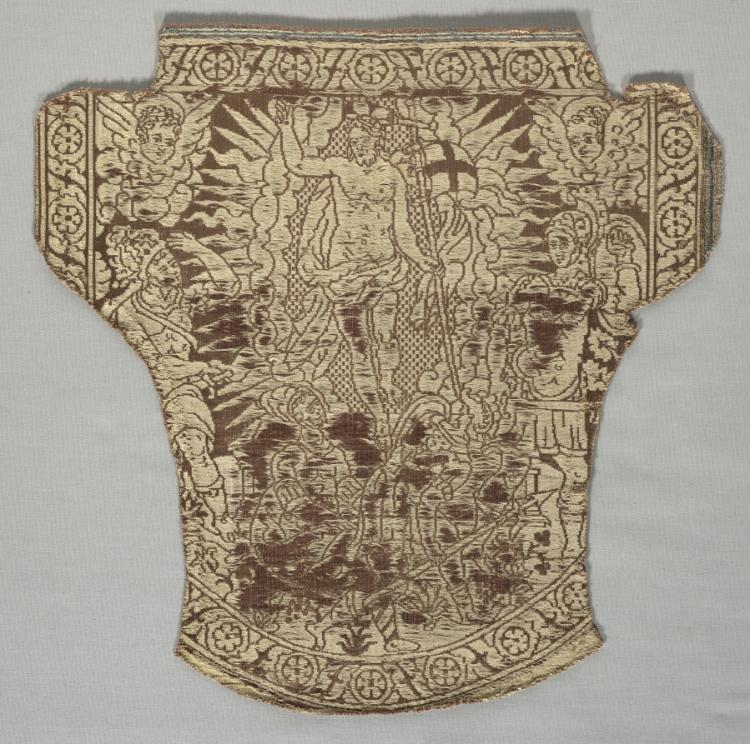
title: Textile Fragment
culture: Italy, Florence, second half of 15th century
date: 1450–1499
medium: lampas weave; silk and linen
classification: Textile